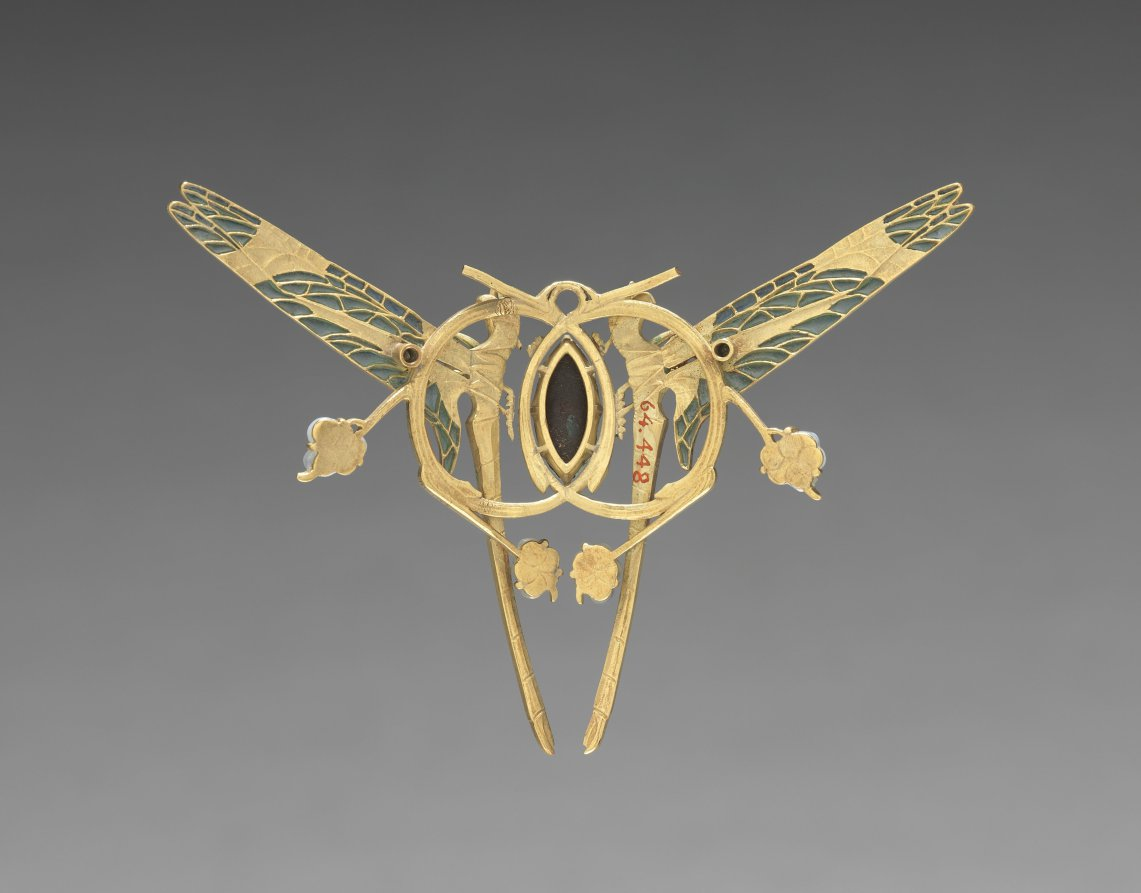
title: Dragon Fly Brooch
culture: France, late 19th-early 20th Century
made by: René Lalique (French, 1860–1945)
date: c. 1900–1910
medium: gold with plique-a-jour and cloisonne enamels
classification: Jewelry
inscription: inscribed on side of mount to the right: LALIQUE.